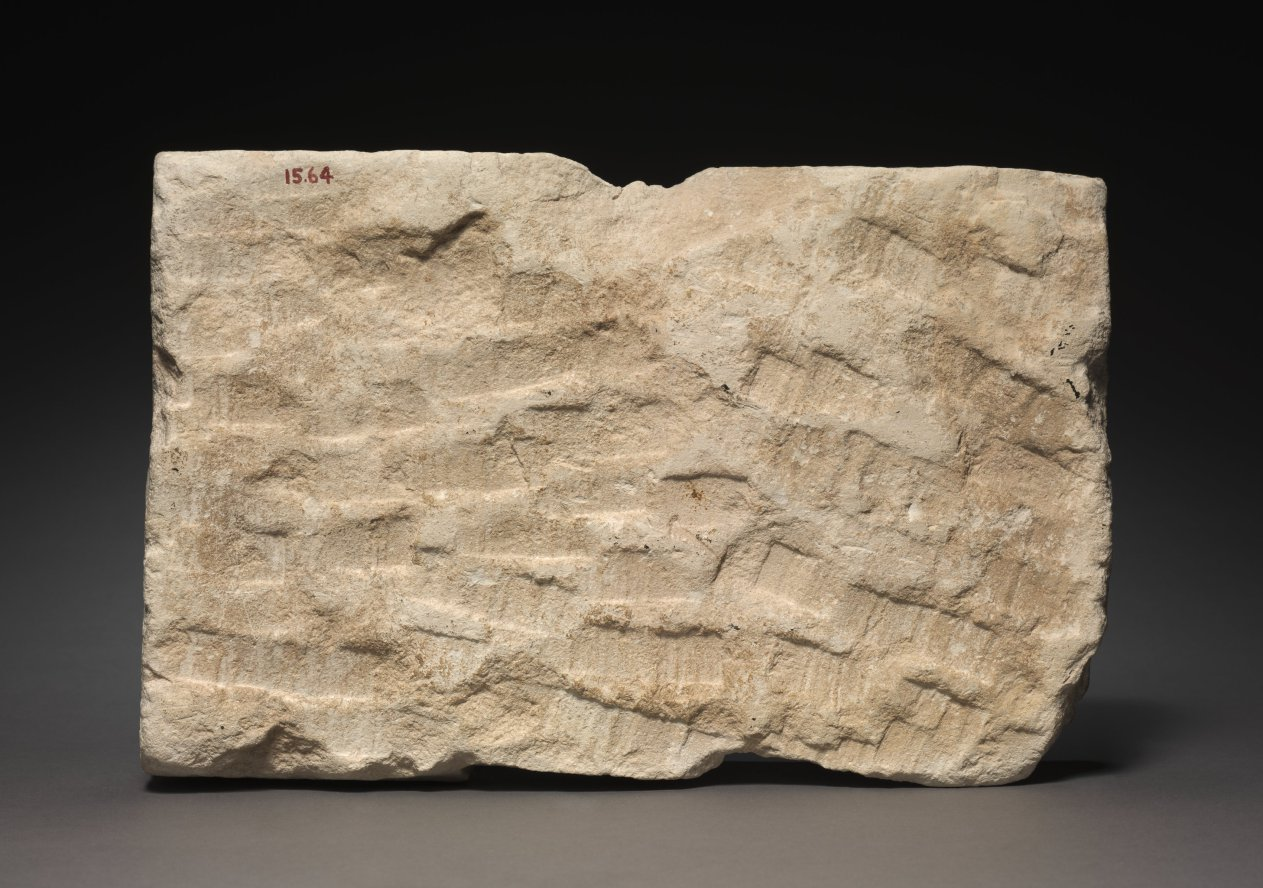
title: Offering Table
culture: Egypt, Middle Kingdom (2040–1648 BCE)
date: 2040–1648 BCE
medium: limestone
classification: Sculpture